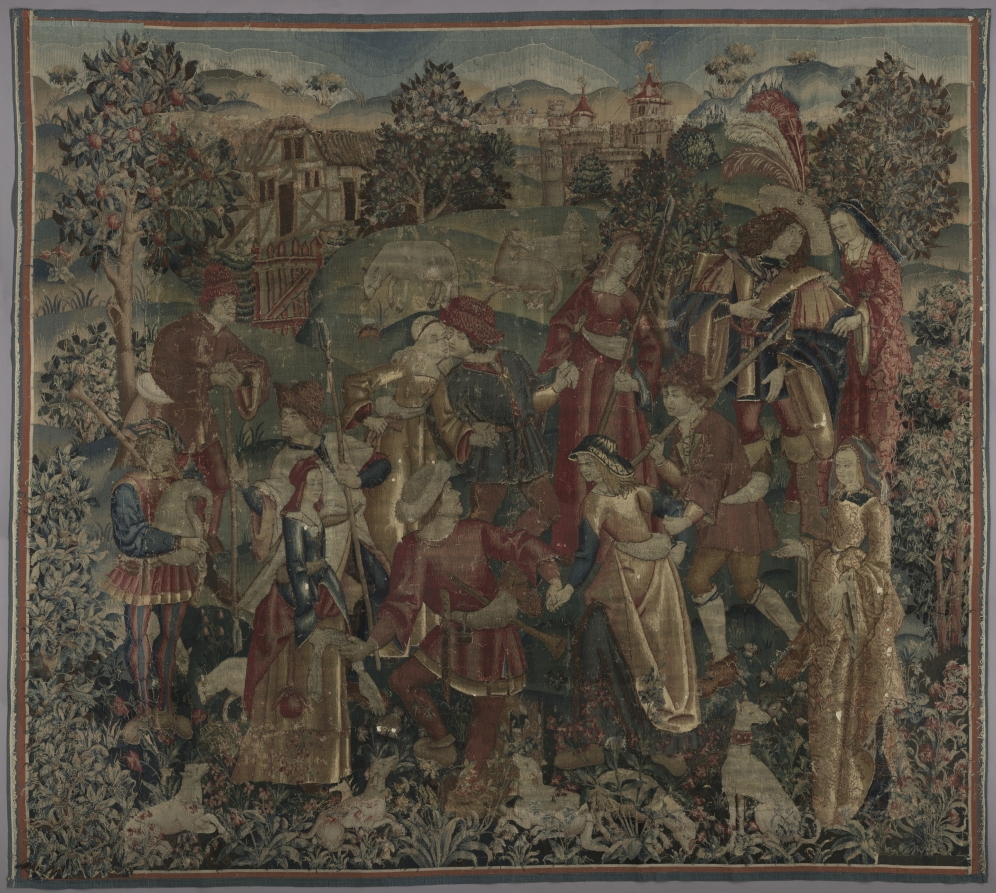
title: Shepherds in a Round Dance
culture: Netherlands, early 16th century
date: around 1500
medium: Wool and silk: tapestry weave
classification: Tapestry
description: Late medieval tapestries often use a limited yet contrasting color palette to portray stylized images. The expressions of these figures, for example, are conveyed more by their postures than by their faces. Four shepherds and shepherdesses join hands and dance to the music of a bagpiper at the far right, while a lord and two ladies on the left look on. A dog and sheep amid blossoming plants and trees contribute to the festive pastoral scene in front of a castle.